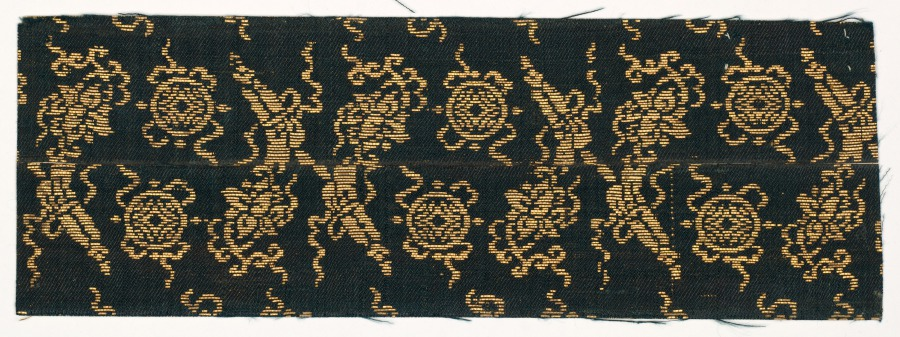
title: Textile Fragment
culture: Japan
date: 1800s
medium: silk, metallic thread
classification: Textile